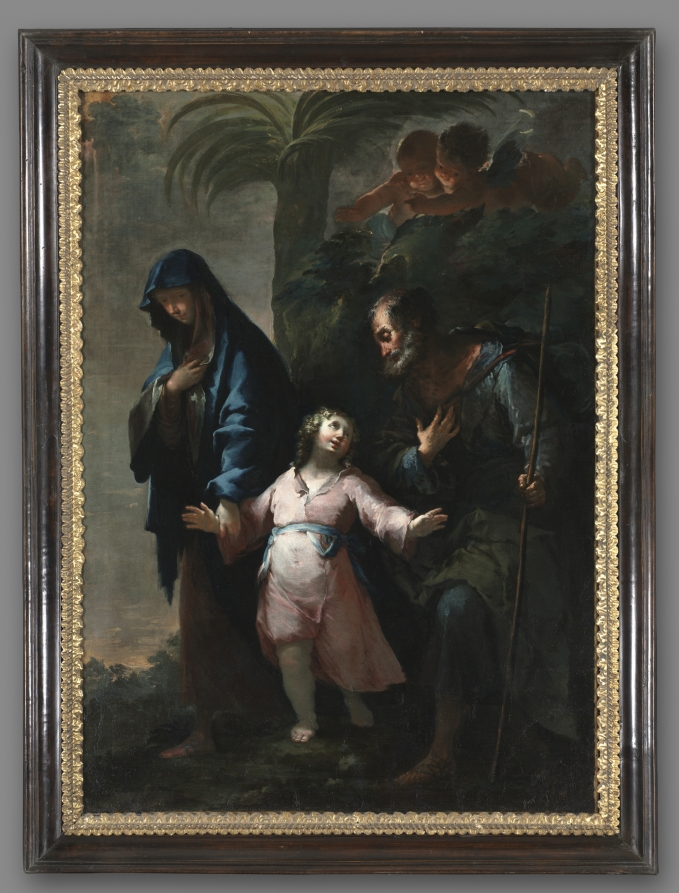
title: Return to Nazareth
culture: Italy, 18th century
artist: Francesco Conti (Italian, 1681–1760)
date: 1735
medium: oil on canvas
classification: Painting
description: Upon hearing rumor of a young king born to a virgin in Bethlehem, Herod, the ruler of Judea, jealously developed a plot to find and murder the infant Jesus. Fearing Herod's wrath, the Holy Family escaped to Egypt and eventually returned to Palestine-an echo of the great Exodus of the Old Testament. Conti trained in Rome but eventually made his career in Florence. Even given the pale colors, balletic poses, and attenuated forms, the sharp contrasts of dark and light, with figures emerging from deep shadow, attests to the long shadow of Caravaggio even in Florence a century later.